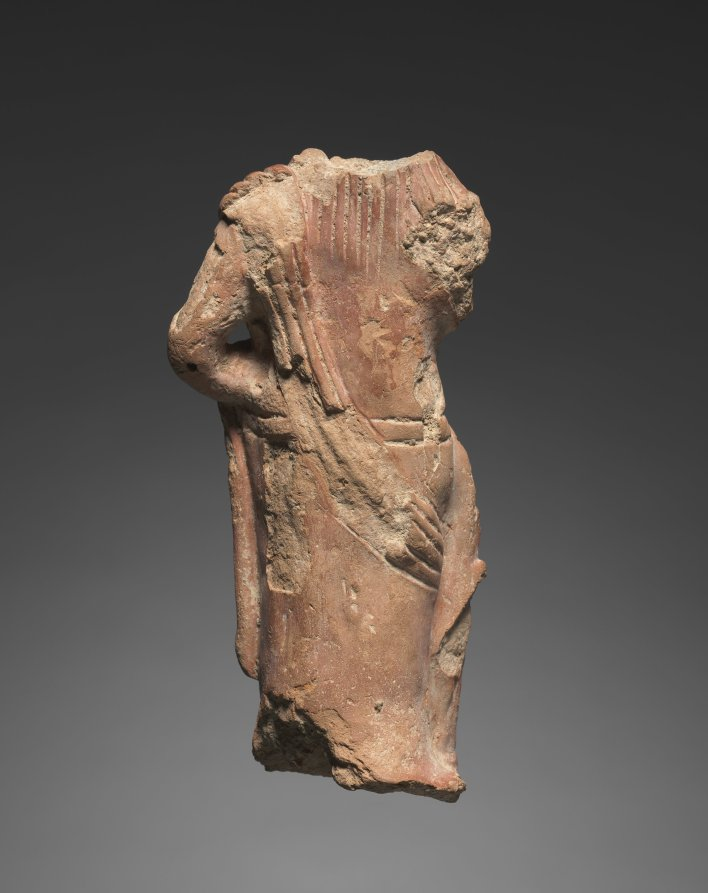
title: Male Fertility Divinity, Possibly Shiva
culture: Northern India, possibly Mathura, Kushan period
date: c. 120–200 CE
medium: terracotta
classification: Sculpture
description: This figure combines an unusual set of attributes. He has long dreadlocks over his shoulders, like an ascetic, and he holds a water pot, like a Brahmin or naga (serpent deity). Also, he seems to carry a sword and dagger like a warrior and is ithyphallic, indicating his virility and fecundity. He may best be identified as a local divinity worshipped for purposes of increasing fertility, but he could also be recognized as an early form of the Hindu god Shiva.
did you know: This sculpture was first made from a mold, then subsequently hand modeled.